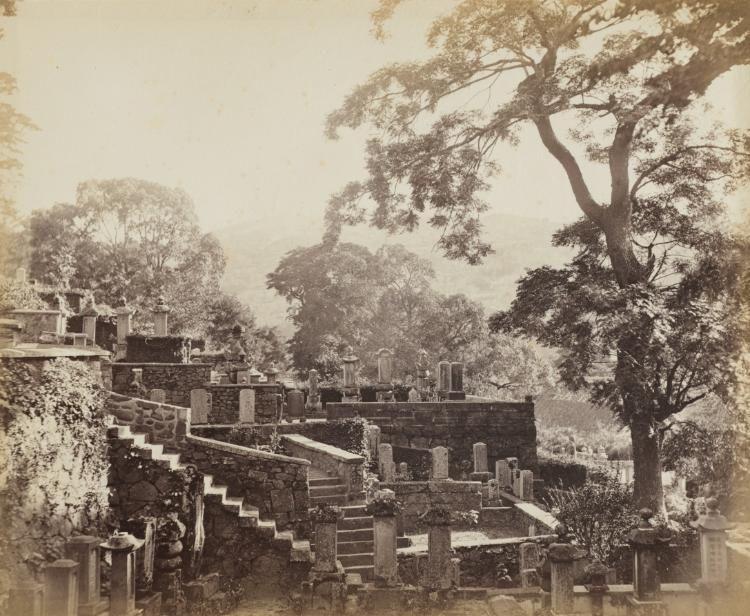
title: Japanese Temple Graveyard, Shuntoji, Nagasaki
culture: England, 19th century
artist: Felice A. Beato (British, 1832–1909)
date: c. 1867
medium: albumen print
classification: Photograph